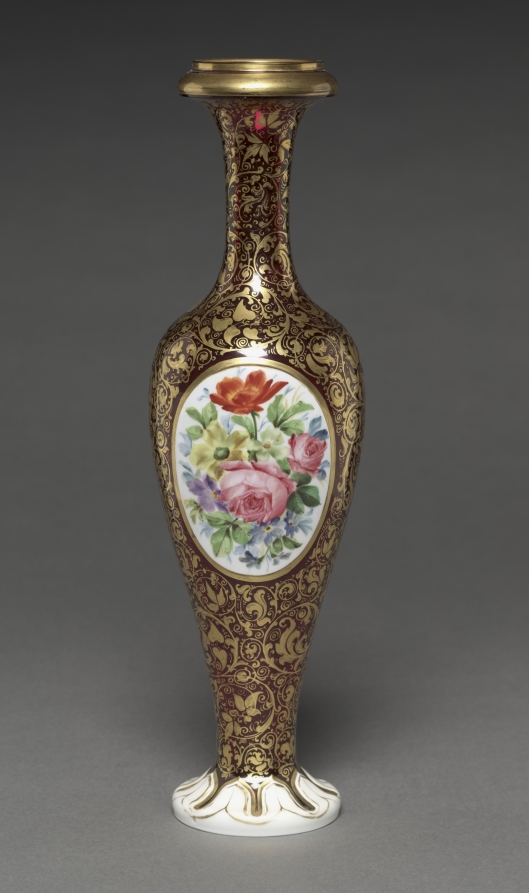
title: Vase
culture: Bohemia (?), 19th century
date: 1840–1860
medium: glass with enamel and gilt decoration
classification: Glass